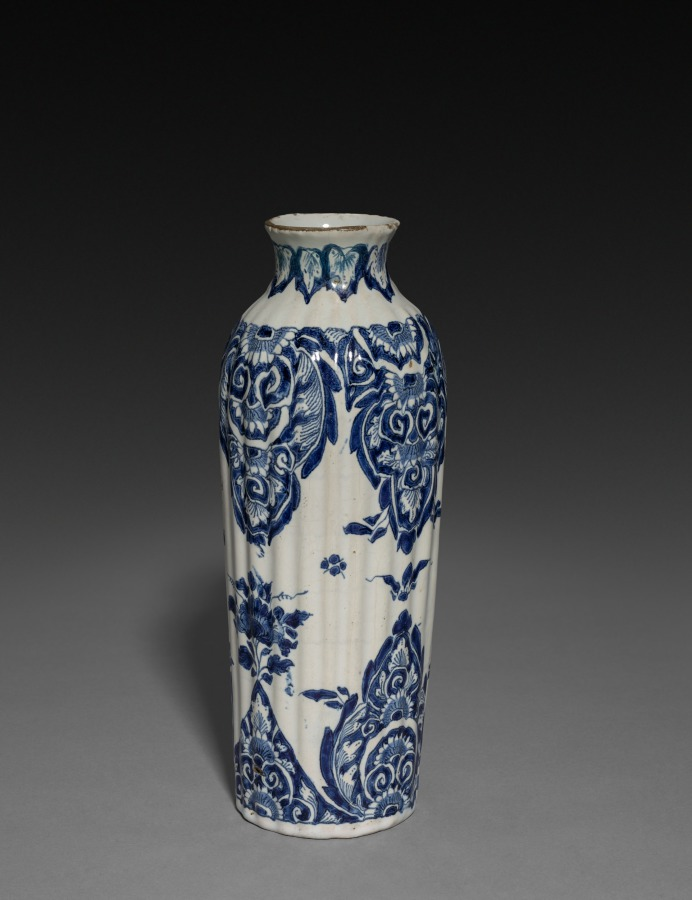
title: Bottle-Shaped Vase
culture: France, Rouen, early 18th Century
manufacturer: Rouen Factory (French)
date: c. 1700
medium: faience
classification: Ceramic